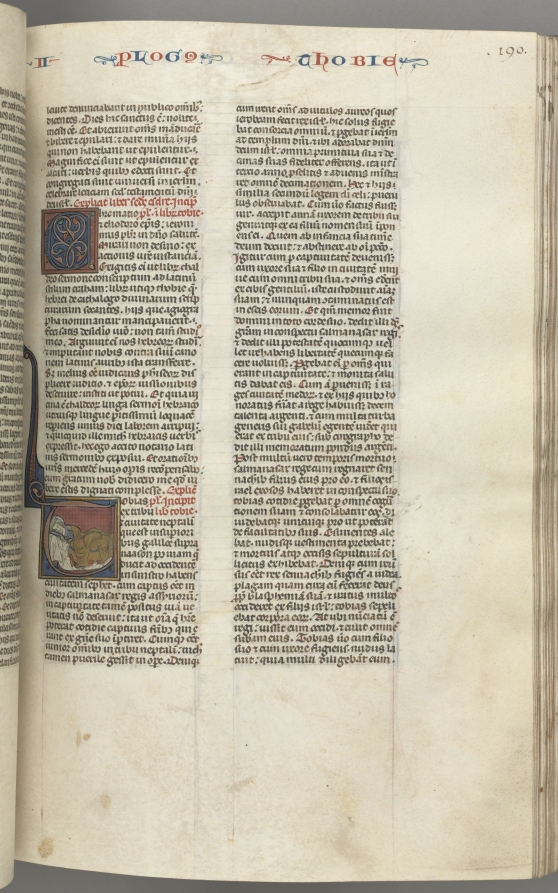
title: Fol. 190r,Tobit, historiated initial T, Tobit sleeping on a bed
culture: Southern France, Toulouse(?), 13th century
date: c. 1275–1300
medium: ink, tempera and gold on vellum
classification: Bound Volume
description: Biblical manuscripts were highly prized and important possessions of churches, monasteries, cathedral schools, and universities throughout medieval Europe. The biblical texts were known as the vulgate, the translations made by Saint Jerome in the fourth century from Hebrew and Greek into Latin, which became the definitive and official Latin version of the Roman Church. In the 13th century, the bible was, for the first time, produced as a single volume with an officially sanctioned sequence to its books and chapters as illustrated by this example. The very extensive decoration of this bible is arranged hierarchically to indicate the relative importance of the various texts so that full or almost full-page initials mark the openings of the first prologue, Genesis, and the first Gospel; historiated initials mark the beginning of each book and illuminated initials mark the Prologues.